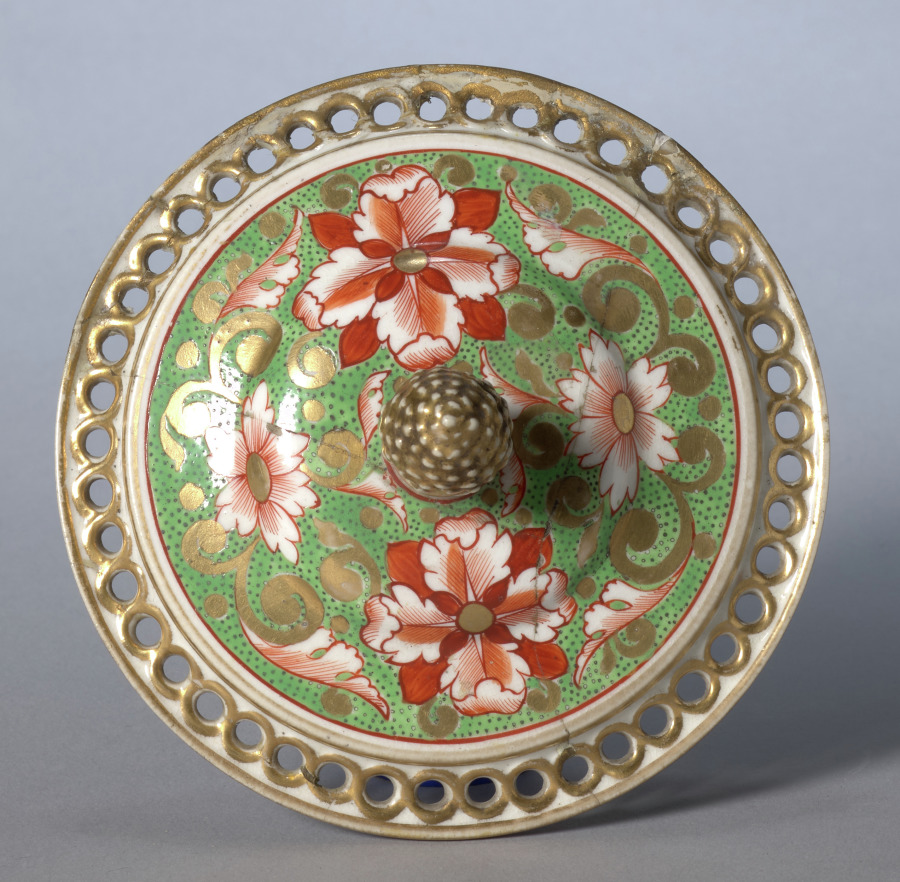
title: Cover for a Potpourri Vase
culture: England, Derby, 19th century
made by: Derby (Crown Derby Period) (British)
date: c. 1810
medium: porcelain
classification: Ceramic